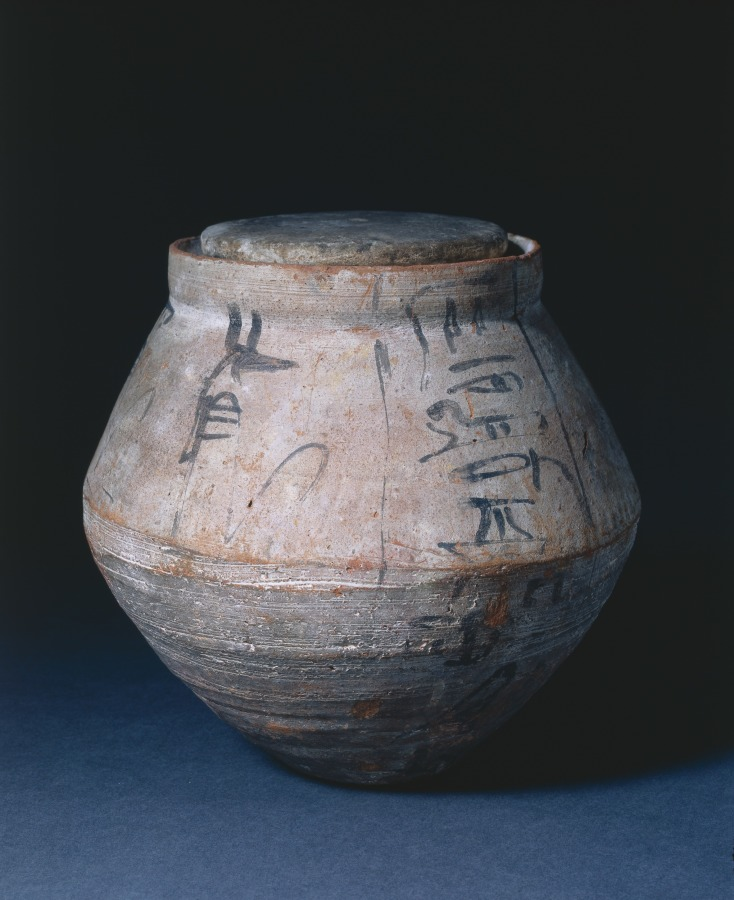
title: Shawabty Jar with Lid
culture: Egypt, New Kingdom (1540–1069 BCE), Dynasties 19–20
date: 1295–1069 BCE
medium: Nile silt ware; lid of limestone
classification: Funerary Equipment